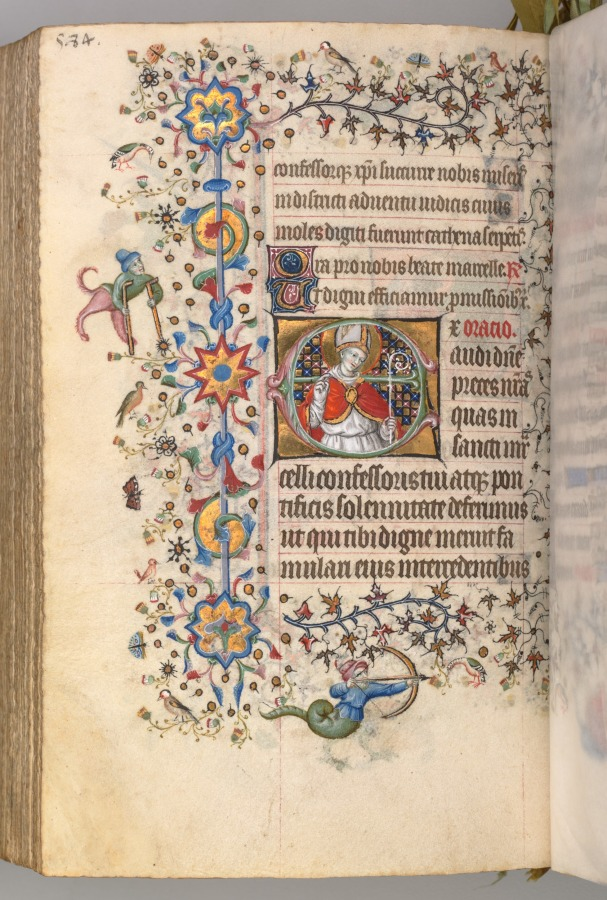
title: Hours of Charles the Noble, King of Navarre (1361-1425): fol. 286v, St. Marcel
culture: France, Paris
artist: Master of the Brussels Initials and Associates (French)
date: c. 1405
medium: ink, tempera, and gold on vellum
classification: Bound Volume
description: This precious volume was obviously highly prized by its owner, the French-born King of Navarre, who had his coat of arms painted on no less than twenty folios. Rather than directly commissioning this manuscript from a specific workshop, it seems that Charles the Noble acquired his book of hours -- perhaps ready-made for the luxury market -- while on a trip to Paris in 1404-05. A collaborative effort, six painting styles are evidenced within the pages of this codex, those of two Italians, two Frenchmen, and two Netherlanders. The painter who was responsible for the planning and decoration of the book, and who produced seventeen of the large miniatures, was a Bolognese artist known as the Master of the Brussels Initials. His principal assistant, responsible for most of the borders, was a Florentine who signed his name "Zecho" da Firenze on folio 208 verso.